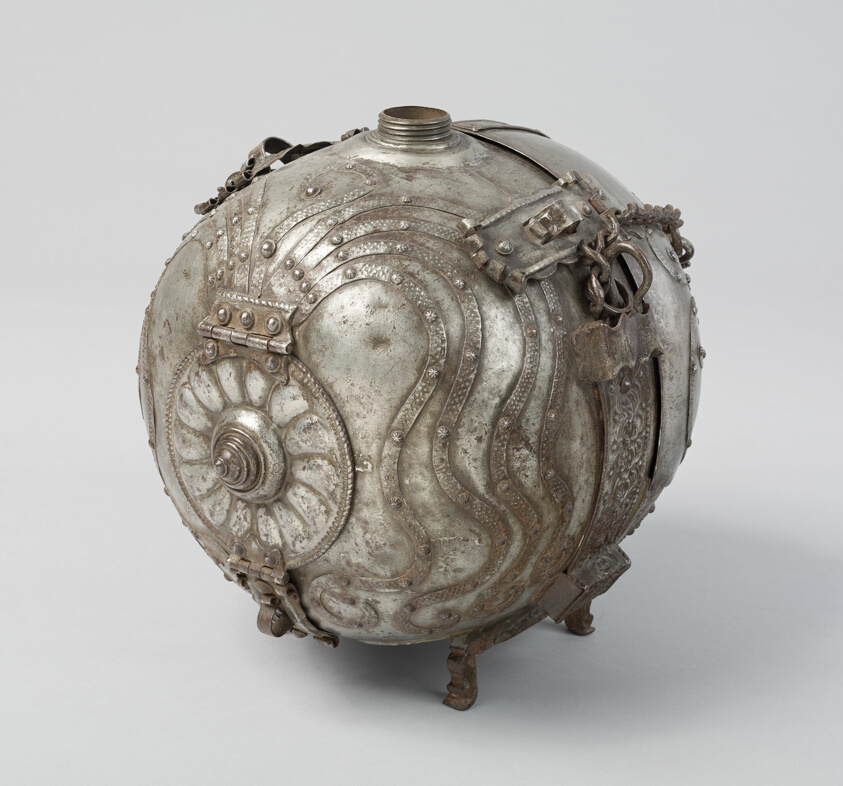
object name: Armor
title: Field Stove and Canteen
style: 21st Century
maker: German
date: 1650/1700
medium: Iron, and tin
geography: Europe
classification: arms and armor, miscellaneous; arms and armor; armor